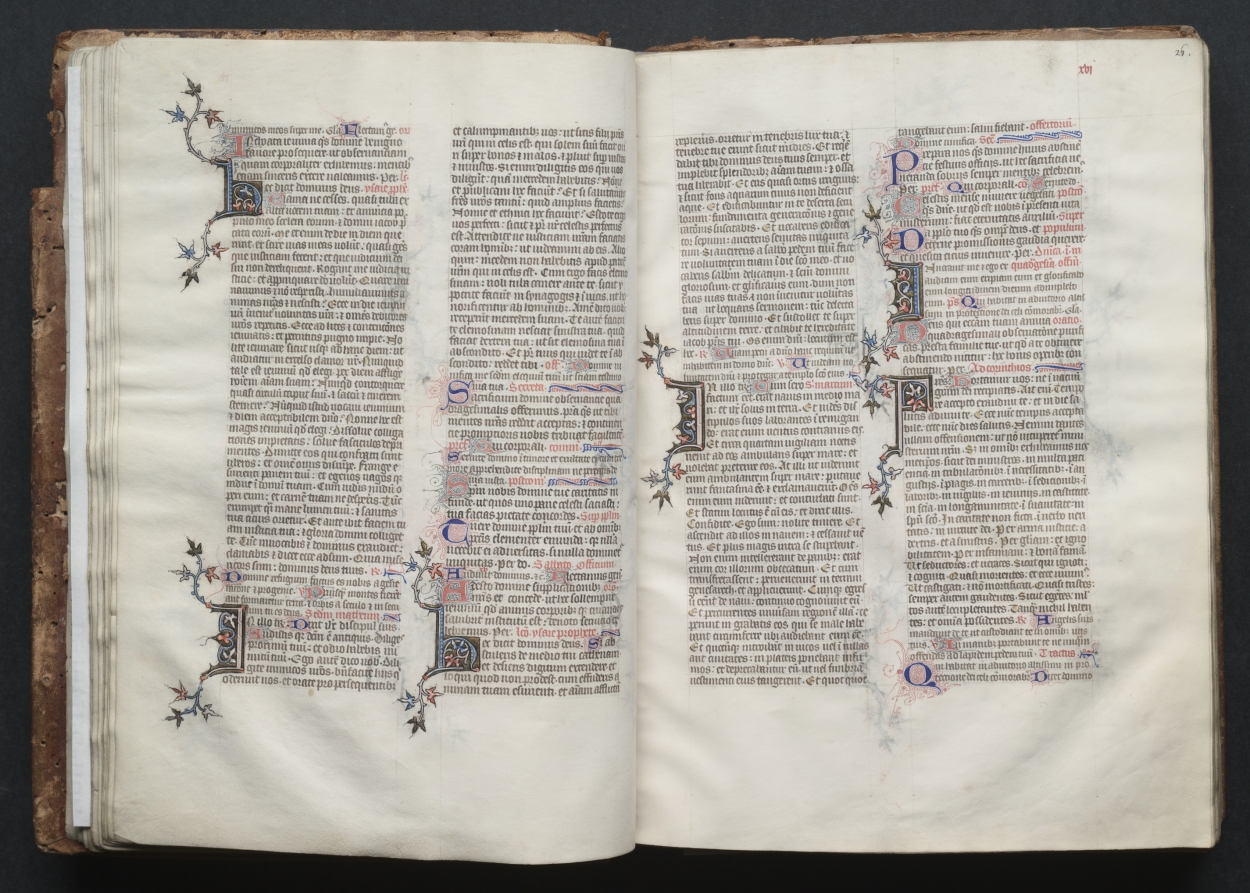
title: The Gotha Missal: Fol. 26r, Text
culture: France, Paris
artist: Master of the Boqueteaux (French)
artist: and Workshop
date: c. 1375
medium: ink, tempera, and gold on vellum; blind-tooled leather binding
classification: Bound Volume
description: The style and quality of this manuscript's decoration is typical of deluxe Parisian books made for aristocratic or royal patrons. Most of the book's decoration appears to be the work of the Master of the Boqueteaux, an artist active at the court of King Charles V (died 1380). His style was apparently shared by a number of book illuminators working in and around Paris. It is very possible that the Gotha Missal belonged to Charles V, but is not provable because the manuscript has no royal portraits and lacks a colophon. Given the book's magnificent decoration, however, it would seem that it was produced for a Valois prince, if not for the king himself. The manuscript receives its name from the German dukes of Gotha, its later owners.